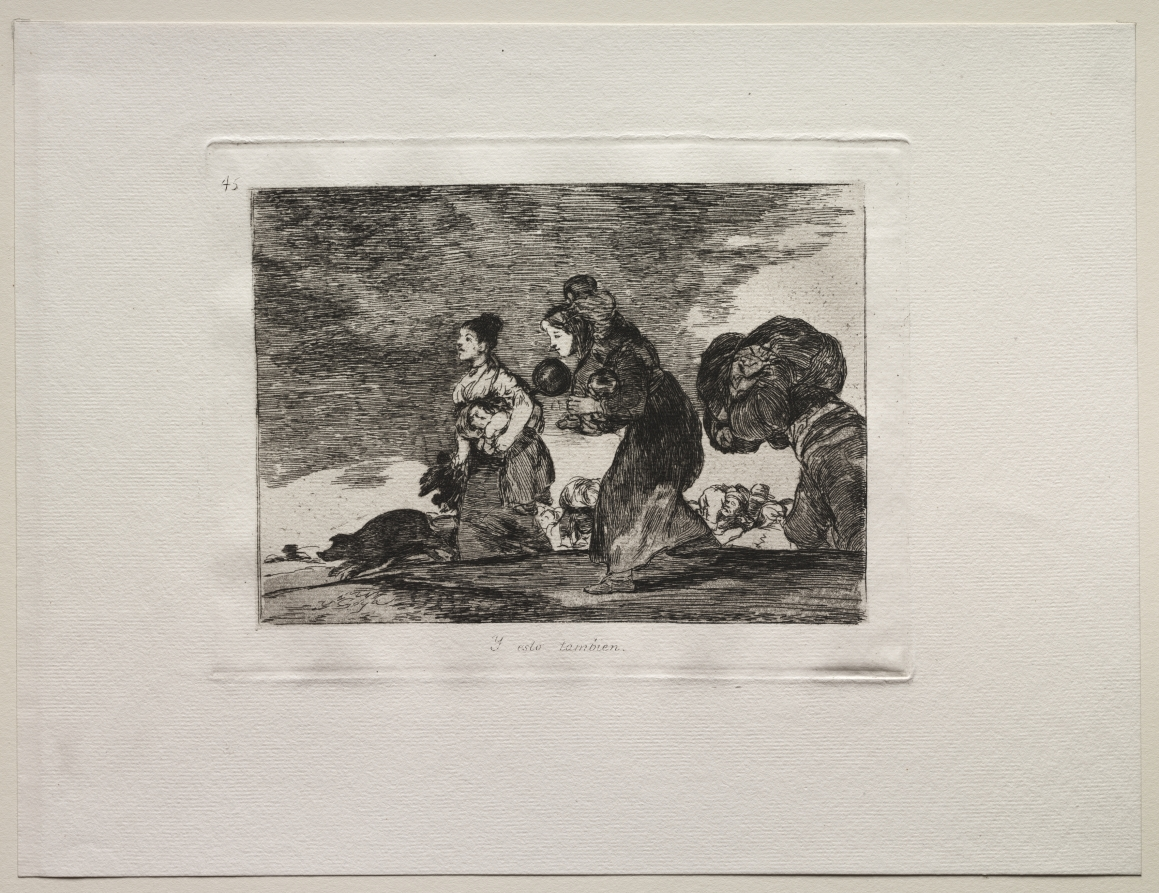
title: The Horrors of War: And This Too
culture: Spain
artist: Francisco de Goya (Spanish, 1746–1828)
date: c. 1810–20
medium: etching and aquatint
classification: Print